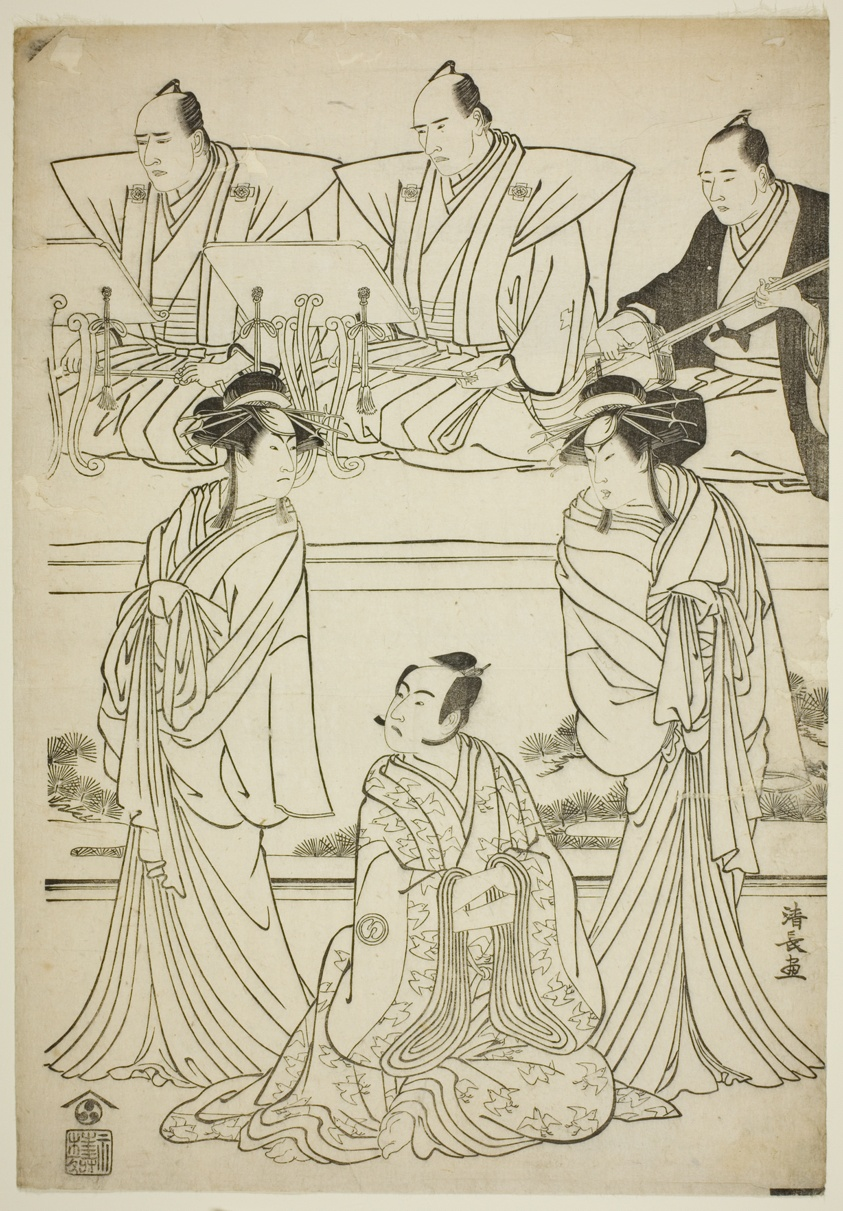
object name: Print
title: The Actors Segawa Kikunojo III as the ghost of Yatsuhashi, Sawamura Sojuro III as Soga no Juro, and Ichikawa Danjuro V as the ghost of Seigen, in the play "Sono Omokage Matsu ni Sakura," performed at the Nakamura Theater in the first month, 1783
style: Japanese (culture or style)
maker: Torii Kiyonaga (Japanese, 1752-1815)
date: 1783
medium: Woodblock print; oban, keyblock proof impression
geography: Japan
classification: woodblock print; print; asian art; woodblock